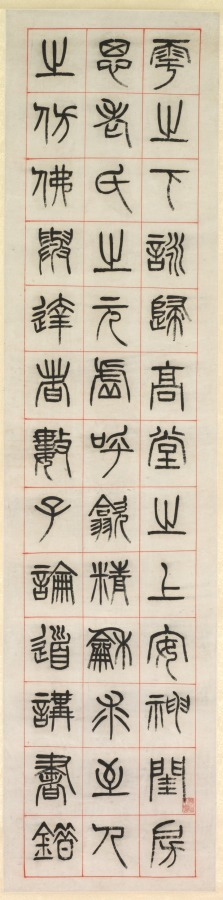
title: On Happiness, Calligraphy in Seal Script Style (zhuanshu)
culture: China, Changsu, Qing dynasty (1644-1911)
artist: Yang Yisun (Chinese, 1813–1881)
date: 1871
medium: hanging scroll, ink on paper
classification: Painting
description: Yang Yisun transcribed this ancient text on six narrow scrolls, starting at the top right and ending at the bottom left. Yang emphasizes the text’s historic nature by using the seal script style found on stone steles and bronze vessels. On Happiness features reflections of a scholar on a leisurely life in the countryside, composed by Han dynasty official Zhongchang Tong, who died the year the Han dynasty collapsed (AD 220). The idyllic life described in the text may bean evocation of the past in a time of national crisis. A decade before Yang wrote these scrolls, Anglo-French forces had looted and burned the Summer Palace in Beijing. At the same time, the domestic Taiping rebellion (1850–64), led by a religious fanatic to overthrow the Qing government, had devastated Yang’s homeland, the Jiangnan region, with an estimated 20 million lives lost.